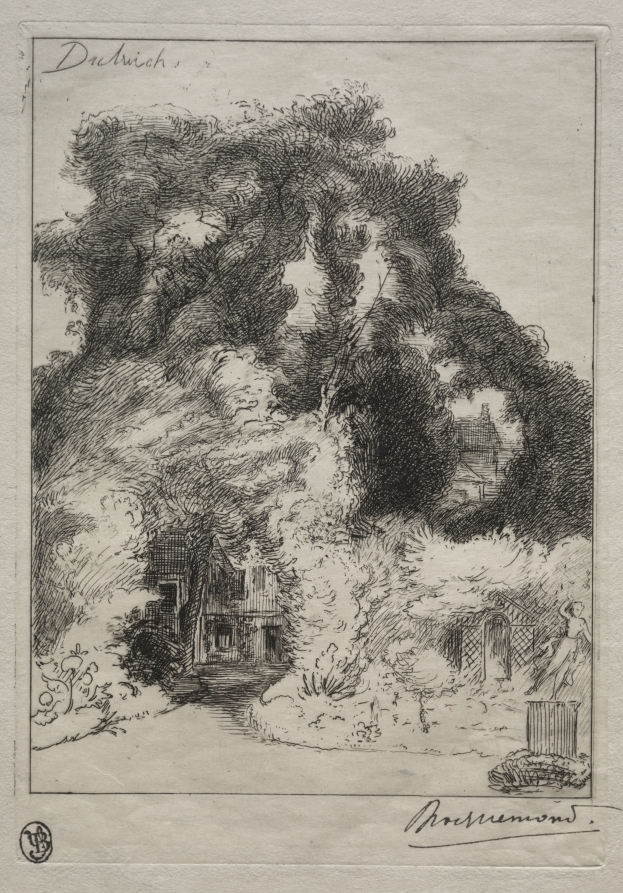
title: The Garden of the Inn at Dulwich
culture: France, 19th century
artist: Félix Bracquemond (French, 1833–1914)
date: c. 1870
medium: etching and drypoint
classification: Print